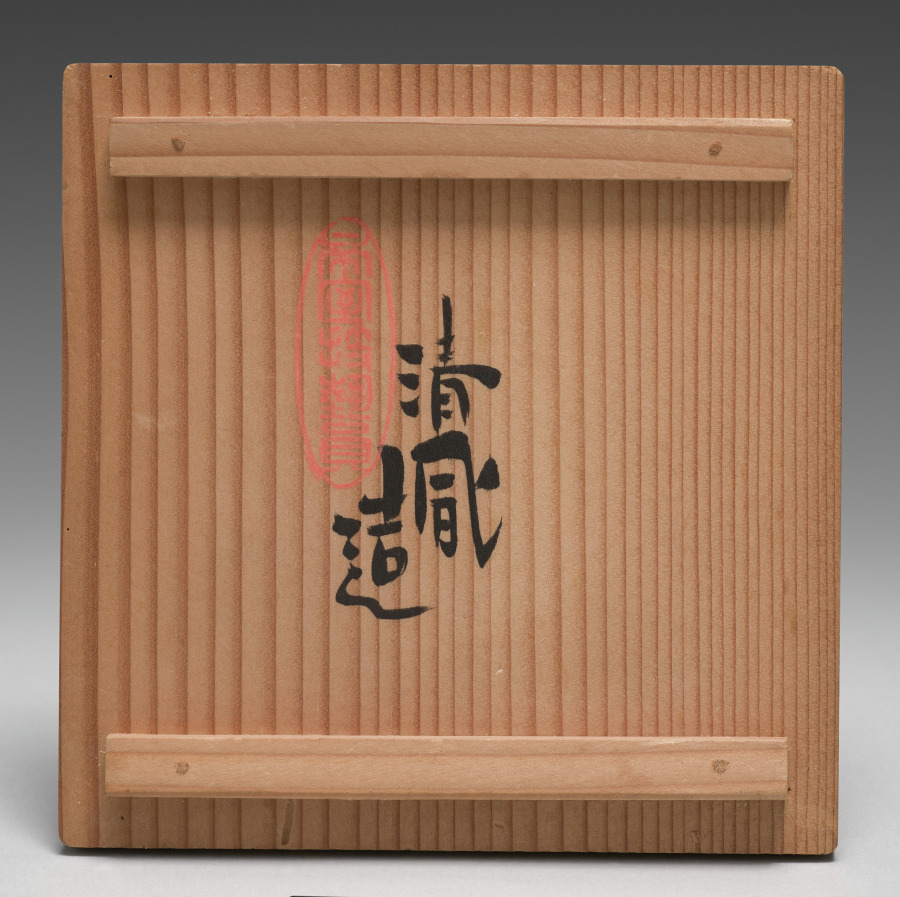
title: Teapot with Begonias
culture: Japan, Meiji period (1868–1912)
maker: Seifū Yohei III (Japanese, 1851–1914)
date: 1897–1914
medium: Porcelain with underglaze and overglaze colors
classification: Ceramic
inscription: 清風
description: This teapot has complex surface treatment: a design of begonias in modulated underglaze blue for the leaves and stems as well as thick overglaze white with incised lines to define the petals, plus small areas of underglaze yellow at their low-relief centers. A band of underglaze blue gives further definition to the lid’s handle, and the area just above the base has a double band of blue above a row of snail-shell curls. Unlike many other teapots, which have marks on their bases, this one has “Seifu” incised into one of its sides in relatively large characters. It is the side that would face the host if the teapot were held by the handle with the right hand, which would be the expectation.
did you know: This teapot with begonias combines underglaze blue with subtle use of yellow and white enamels.